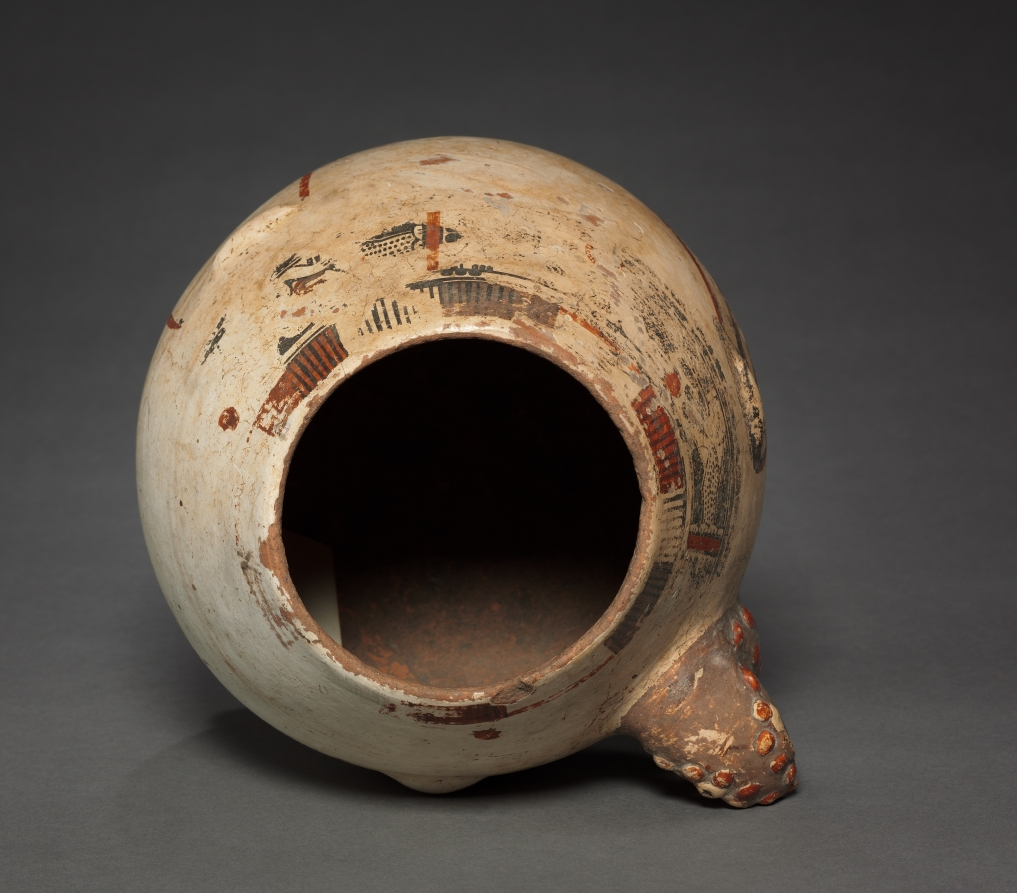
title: Footed Vase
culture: Costa Rica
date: 1000–1550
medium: earthenware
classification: Ceramic